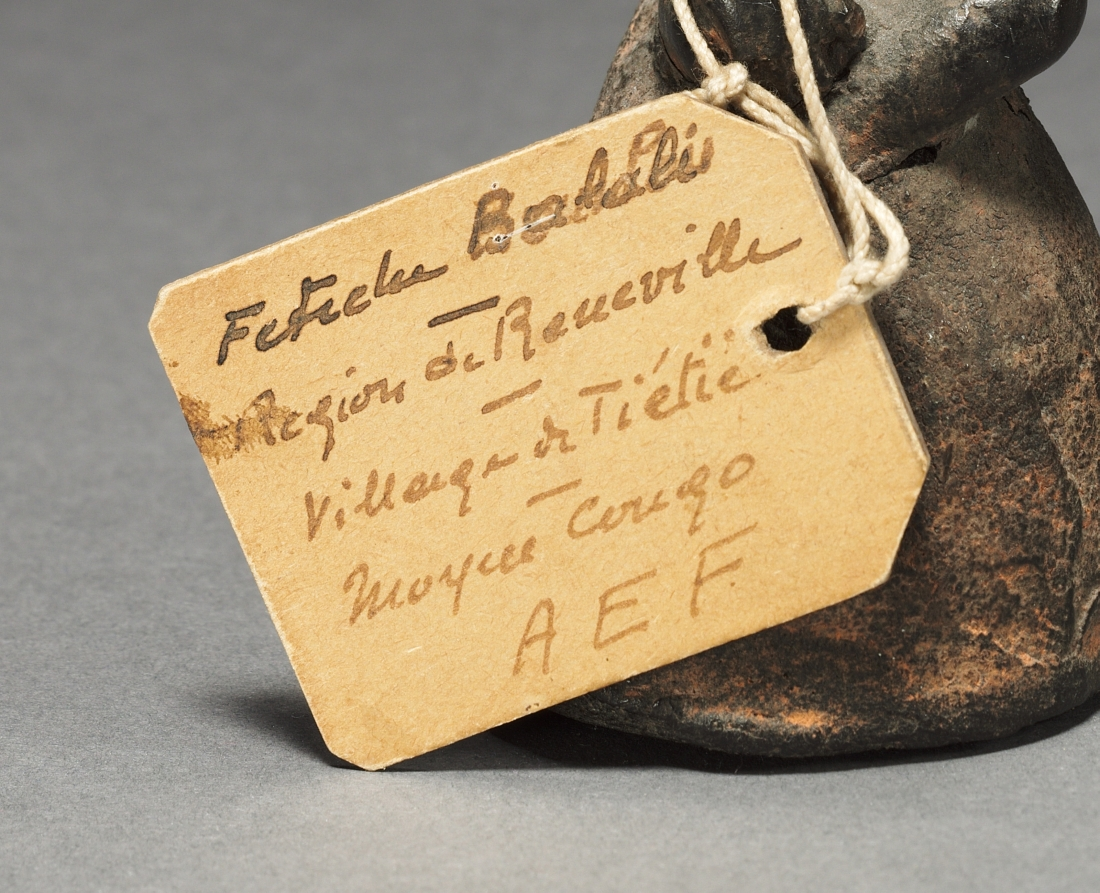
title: Power figure (nkisi)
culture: Africa, Central Africa, Republic of the Congo, Kongo-style maker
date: late 1800s-early 1900s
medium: Wood, organic materials (including resin), cloth, glass, and various other materials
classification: Sculpture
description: One of seven anthropomorphic figurines, these minkisi contained medicines in which an ancestral spirit was believed to reside. The medicines served a metaphorical rather than literal purpose in the resolution of conflicts among Kongo people. This asymmetrical figure wears a mpu headdress of chiefs with its characteristic geometric decoration. The pose may refer to a state of mourning.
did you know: Different from other Minkisi who hold their power in their abdomen, this figure sits atop a sphere in which the active substances still reside.